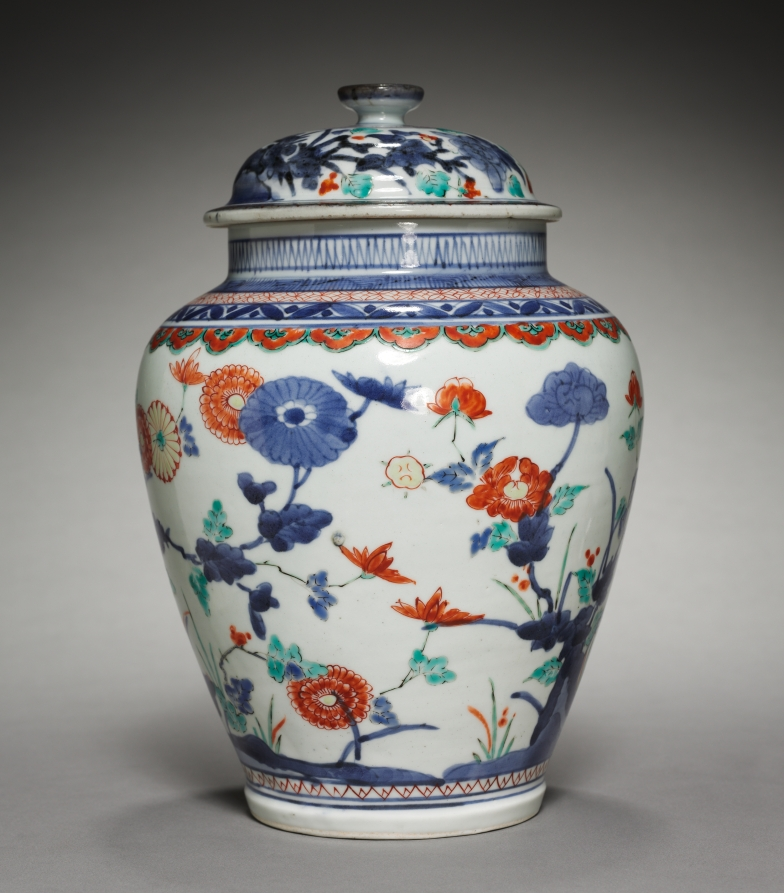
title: Covered Jar with Chrysanthemums, Peonies, and Plum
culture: Japan, Edo period (1615–1868)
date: late 1600s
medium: porcelain with underglaze blue and overglaze color enamel (Hizen ware, Kakiemon type)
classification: Ceramic